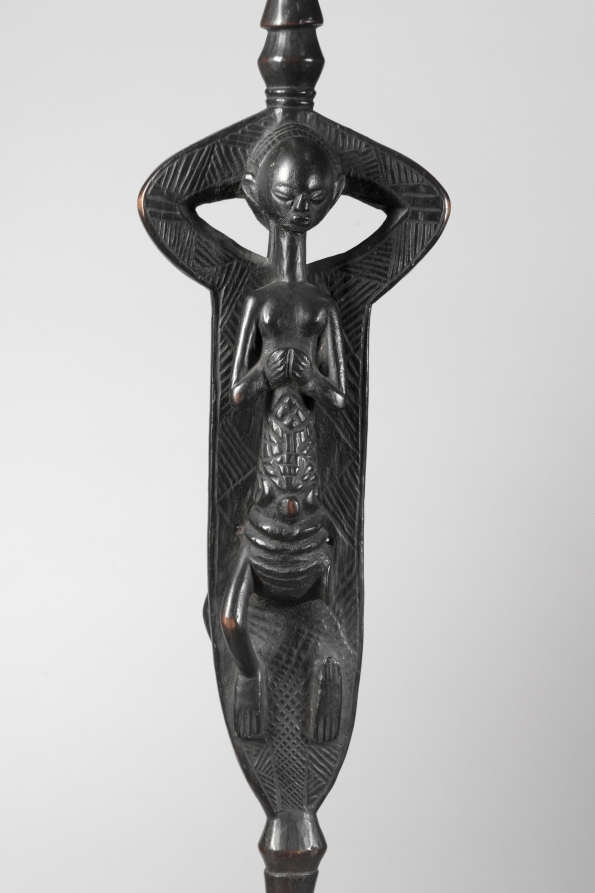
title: Staff of Office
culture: Central Africa, Democratic Republic of the Congo, Luba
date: early to mid-1800s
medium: Wood and iron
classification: Sculpture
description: Sanctified by a ritual specialist and enhanced with medicinal substances, the staff possessed supernatural qualities and was endowed with healing power. Luba staffs are among the most important regalia of Luba kings. The metal point alludes to the kingdom's stability and durability. Each staff has its own distinctive iconography to reflect regional styles. As Chief Msidi (former owner of this staff) ruled over the Yeke kingdom (and not the Luba kingdom), it begs the question of how he acquired this symbol of another realm's power.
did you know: The Yeke kingdom ruler Chief Msidi gave this as a gift of appreciation to the British missionary Frederick Stanley Arnot, whom the chief had invited to his kingdom.